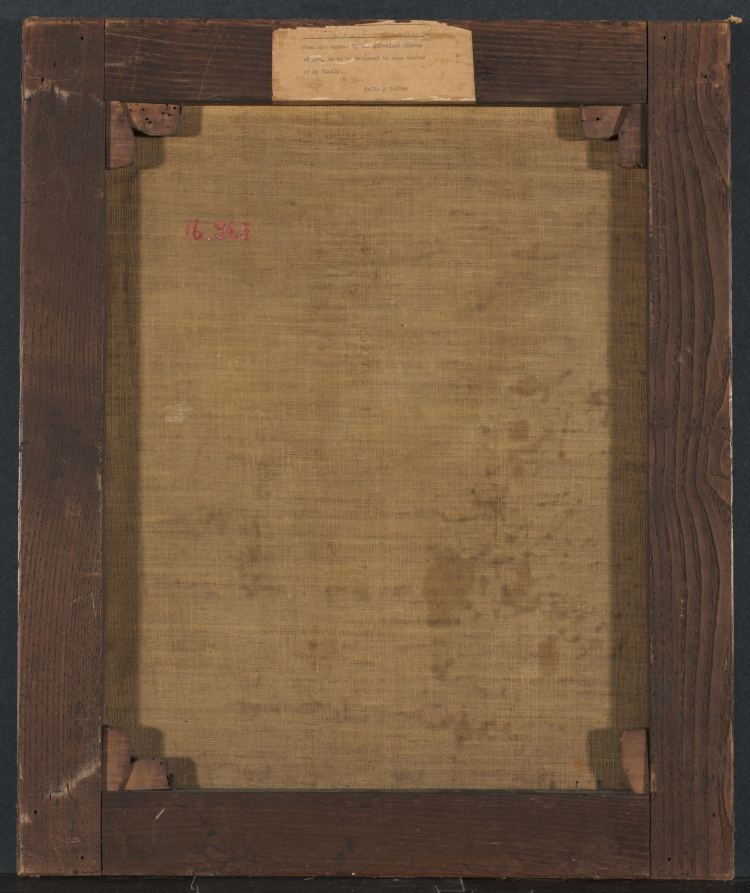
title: Listening Angel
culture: Northern Italy, 16th century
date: 16th century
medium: oil on canvas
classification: Painting